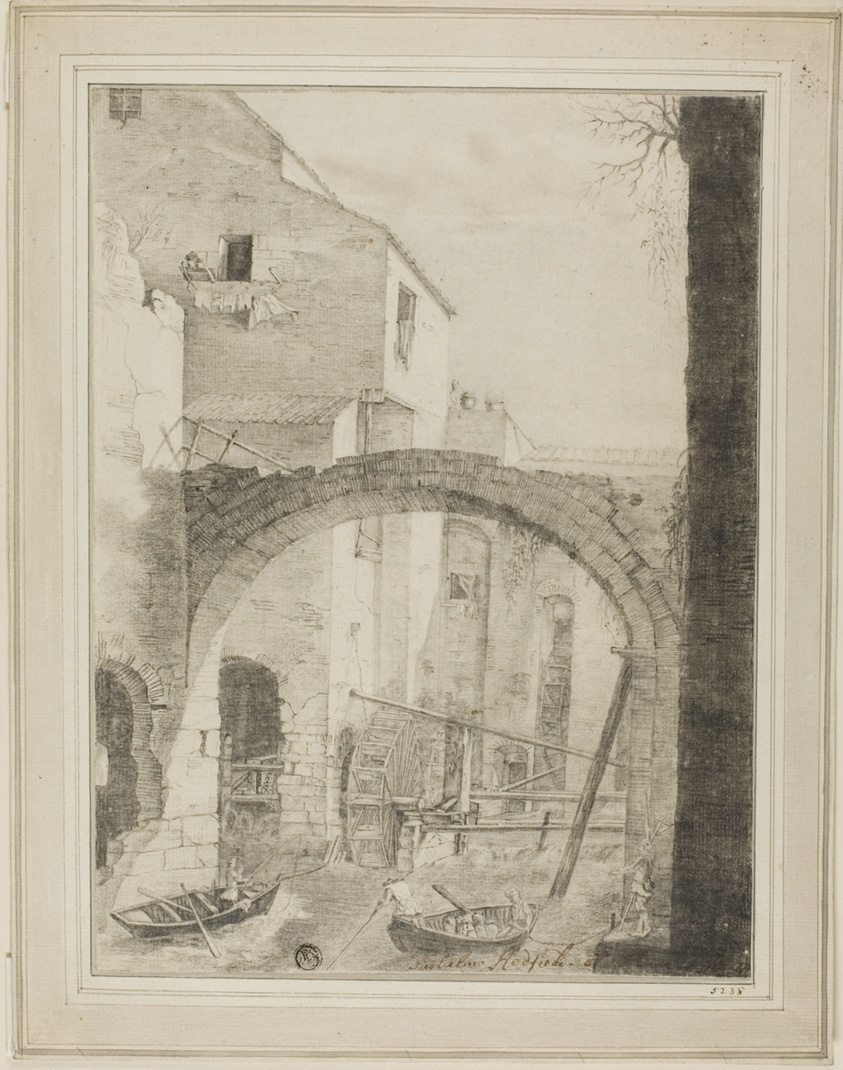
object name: Drawing and Watercolor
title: City Canal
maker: George Hadfield (American, born England, c. 1767-1826)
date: 1778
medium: Black chalk and crayon, on ivory laid paper, laid down on ivory laid paper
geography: United States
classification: chalk; drawings (visual works); prints and drawing